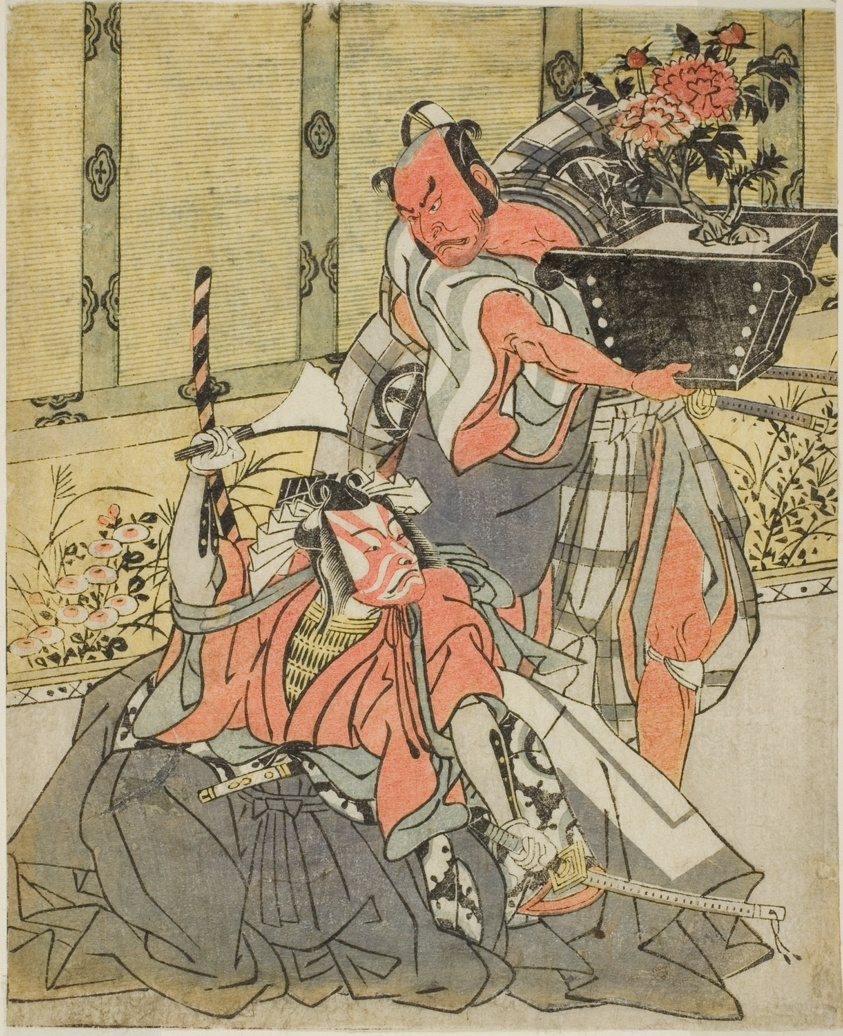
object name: Print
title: The Actors Otani Hiroemon III as Shinagawa Okaminosuke (right), and Ichikawa Danjuro V as Arashishi Otokonosuke (left), in the Play Fuki Kaete Tsuki mo Yoshiwara (Rethatched Roof: The Moon also Shines Over the Yoshiwara Pleasure District), Performed at the Morita Theater in the Eleventh Month, 1771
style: Japanese (culture or style)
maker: Katsukawa Shunsho 勝川 春章; Japanese, 1726-1792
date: c. 1771/72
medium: Color woodblock print; from the illustrated book Yakusha Kuni no Hana (Prominent Actors of Japan)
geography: Japan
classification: woodblock print; print; asian art